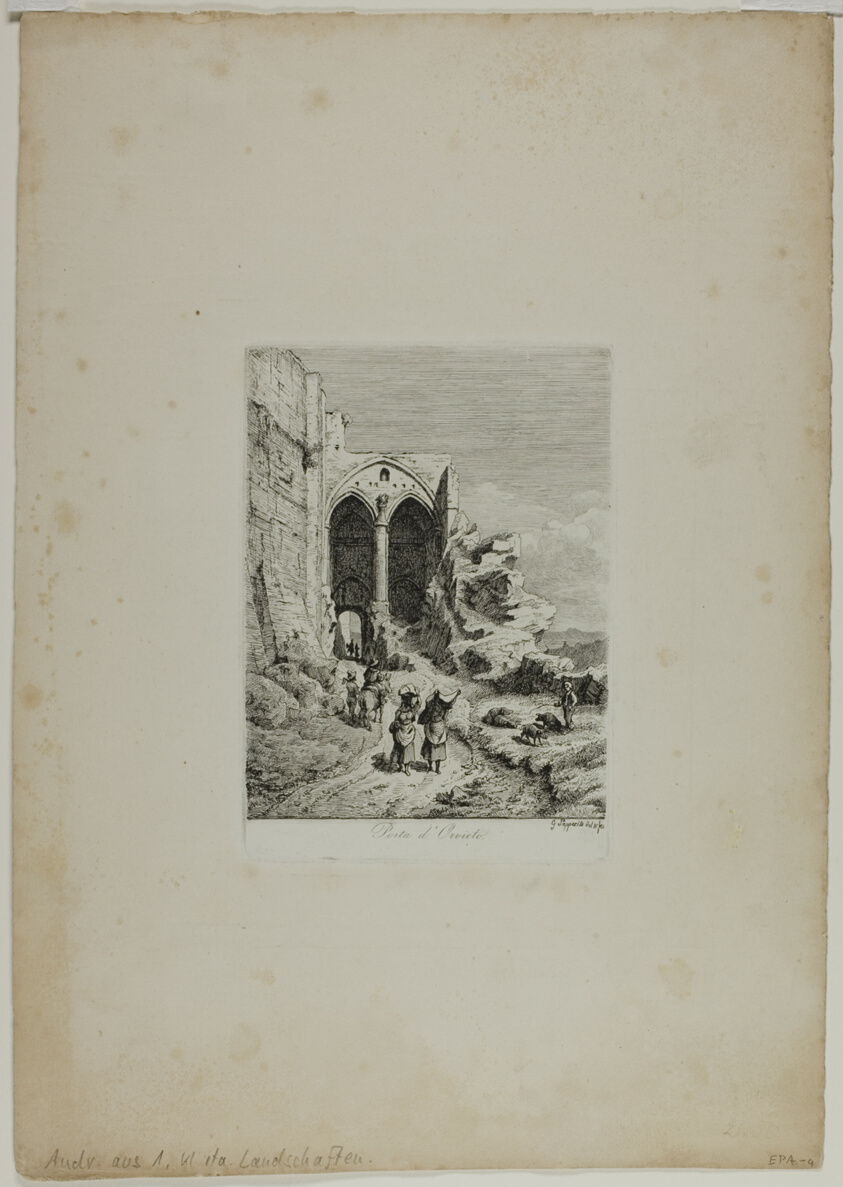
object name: Print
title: Gate of Orvieto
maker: Gustav Friedrich Papperitz (German, 1813-1861)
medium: Etching on white chine, laid down on ivory wove paper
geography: Germany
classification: etching; print; prints and drawing